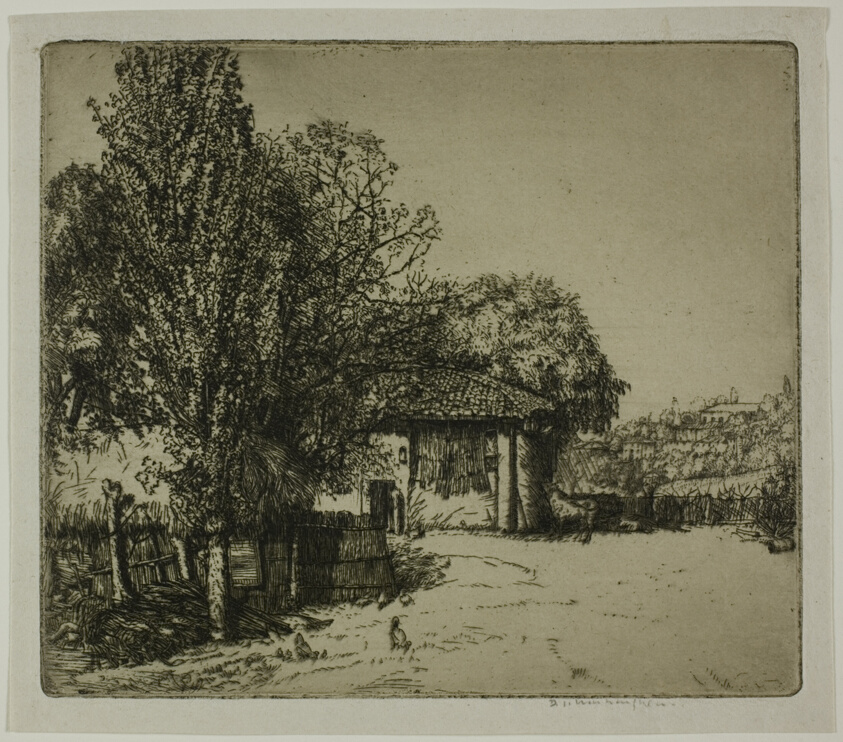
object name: Print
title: Emelia, Italy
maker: Donald Shaw MacLaughlan (American, born Canada, 1876-1938)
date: 1904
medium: Etching in black on cream wove paper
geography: United States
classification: etching; print; prints and drawing